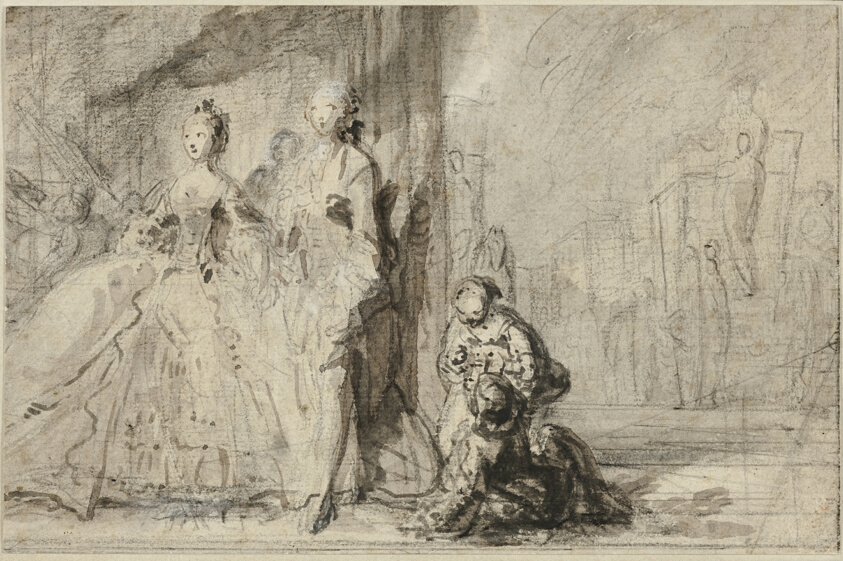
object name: Drawing and Watercolor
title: The Promenade on the Boulevard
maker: Gabriel Jacques de Saint-Aubin (French, 1724-1780)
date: c. 1760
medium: Black chalk, with brush and black, brown and gray wash, heightened with white gouache, on cream laid paper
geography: France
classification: prints and drawing; gouache; brush and wash; chalk; drawings (visual works)